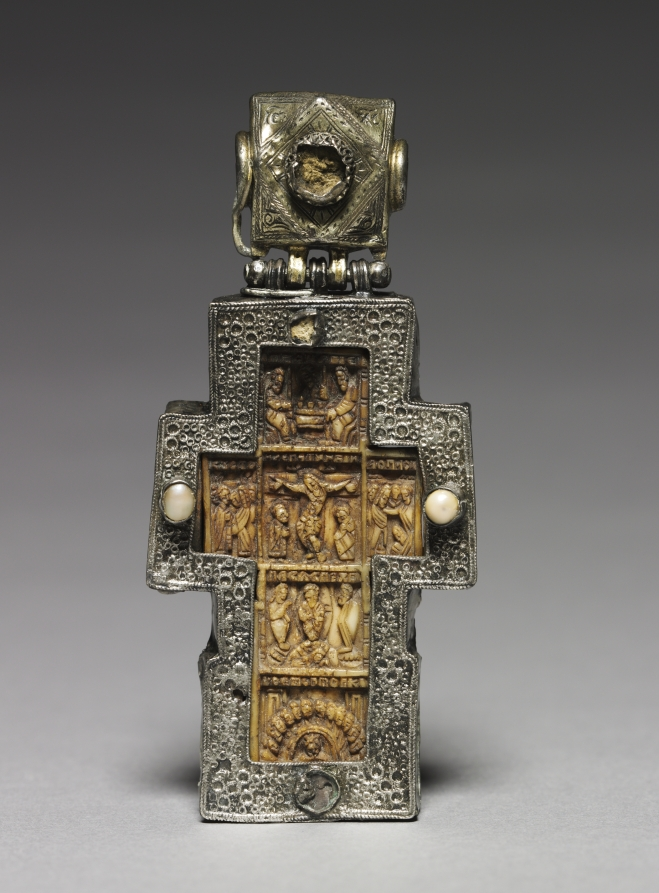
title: Pectoral Cross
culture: Byzantium, Russia, Byzantine period, 17th century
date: 1600s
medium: walrus ivory, wood, partially gilt silver and pearls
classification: Ivory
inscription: Slavonic inscriptions on obverse and reverse.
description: This ivory cross is carved on the front with scenes drawn from Twelve Feasts of the Orthodox Church, including the Passion and Resurrection of Christ; on the reverse is a scene of the Mother of God surrounded by clergy. The scenes include Slavonic inscriptions. The ivory cross is mounted within a silver frame as a pectoral to be worn at the breast, probably by a priest.